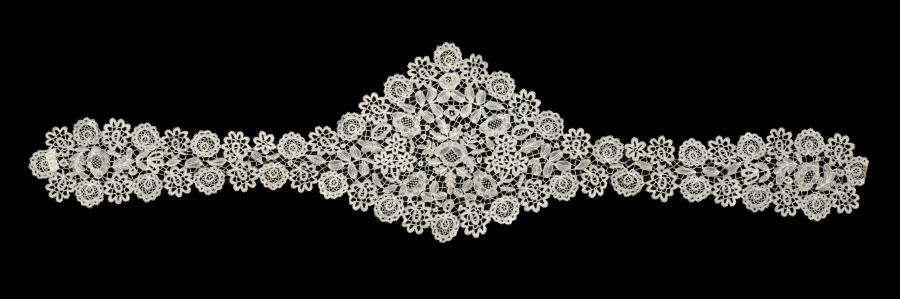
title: Lace Cap Piece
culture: England, Honiton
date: 1800s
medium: Linen: bobbin lace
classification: Lace